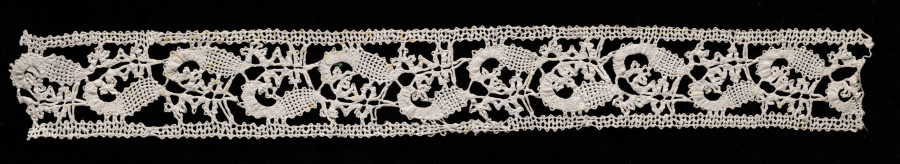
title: Lace Insertion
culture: Italy, Venice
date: 1600–1640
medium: Bobbin lace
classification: Lace